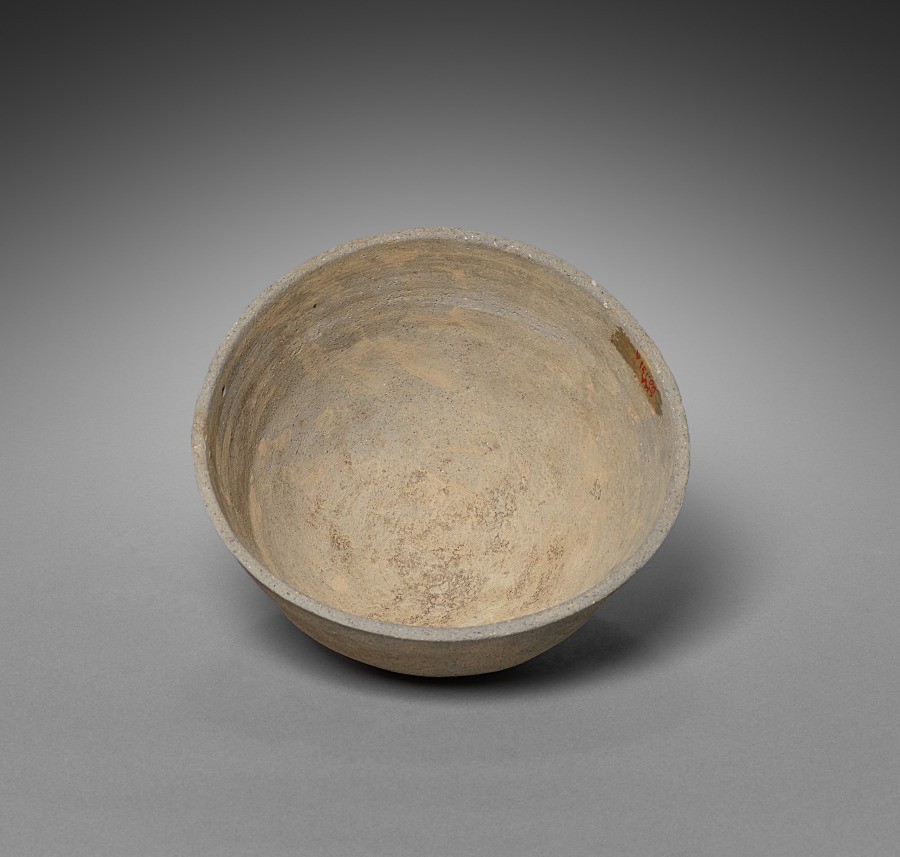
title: Burial Urn with Cover (lid)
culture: Korea, Three Kingdoms period (57 BCE–668 CE)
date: 300s–500s CE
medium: earthenware with impressed design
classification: Ceramic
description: Produced in closed kilns built on hillsides during the Three Kingdoms period, this lidded jar once contained the cremated remains of the dead. This type of burial jar became widespread after the introduction of Buddhism, as cremation became a common practice in Korea.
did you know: Closed kilns built on hillsides became widely used for producing this type of pottery vessel in Korea during the Three Kingdoms period.